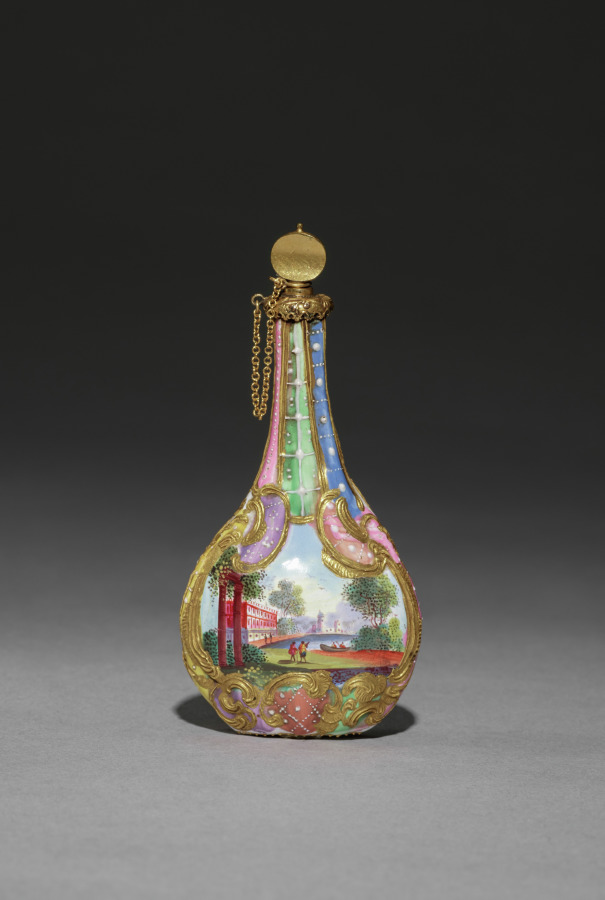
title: Scent Bottle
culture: England, Staffordshire, 18th century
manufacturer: Staffordshire Factory (British)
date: 1700s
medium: enamel on copper with metal mounts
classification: Miscellaneous